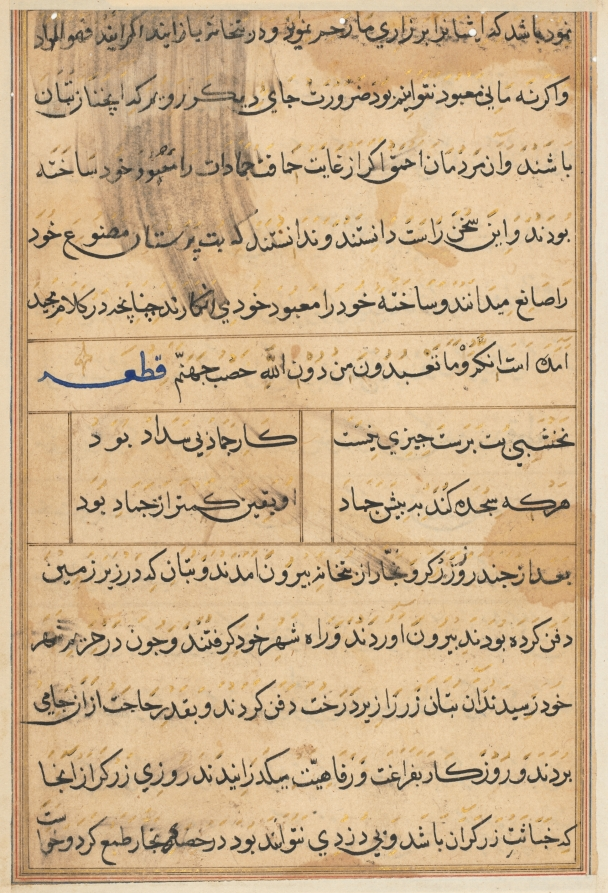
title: Page from Tales of a Parrot (Tuti-nama): text page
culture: Mughal India, court of Akbar (reigned 1556–1605)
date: c. 1560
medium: gum tempera, ink, and gold on paper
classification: Painting